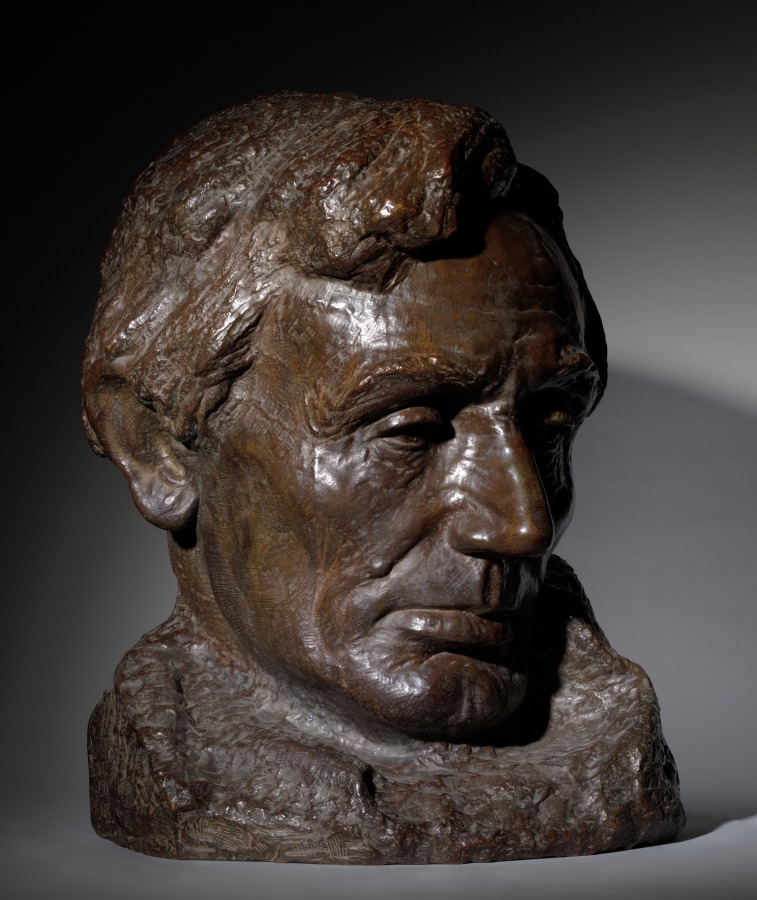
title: Head of Lincoln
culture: America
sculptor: Gutzon Borglum (American, 1867–1941)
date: 1908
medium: bronze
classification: Sculpture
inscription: Signed and dated on left of base: "Gutzon Borglum, 1908"